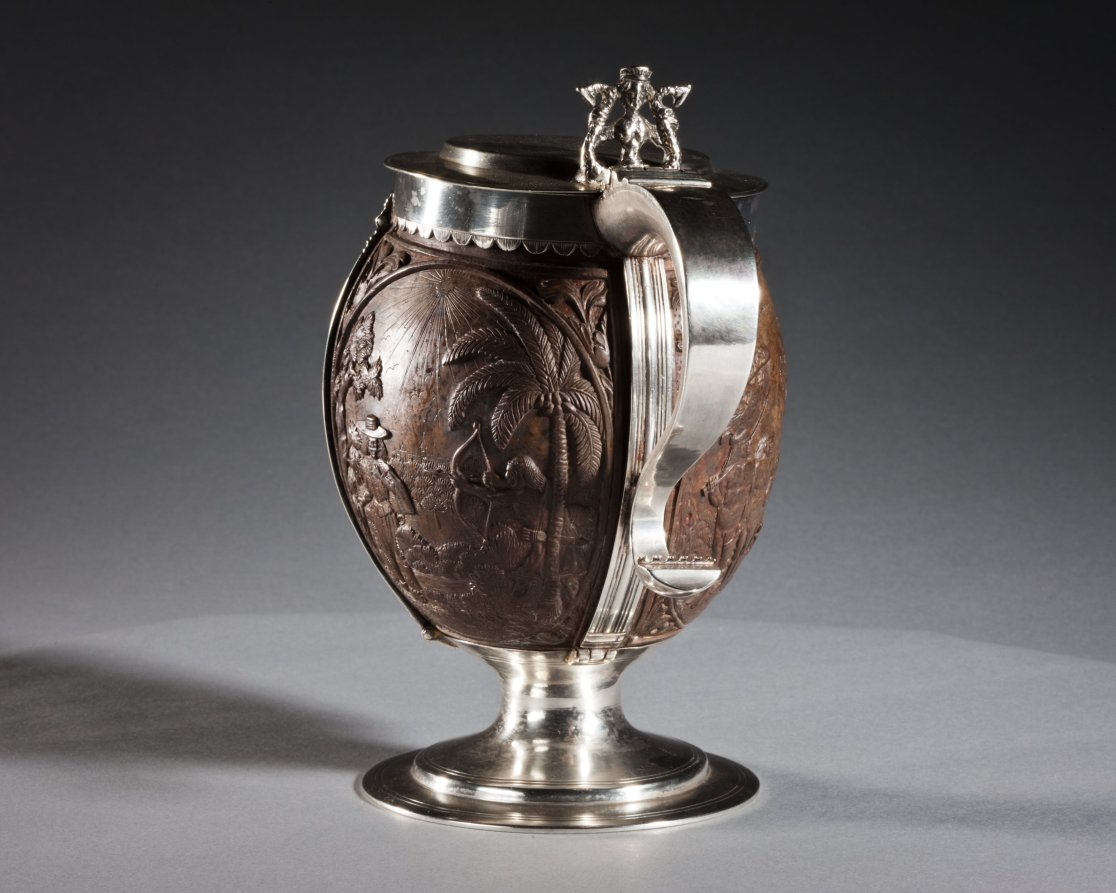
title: Coconut Cup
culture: carved coconut, probably The Netherlands; silver mount, probably England, 17th century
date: c. 1630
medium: carved coconut in silver mount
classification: Metalwork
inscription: top lid has engraved coat-of-arms, underside of lid has inscription: George Lewis TIVERTON Feby, 1st 1760.